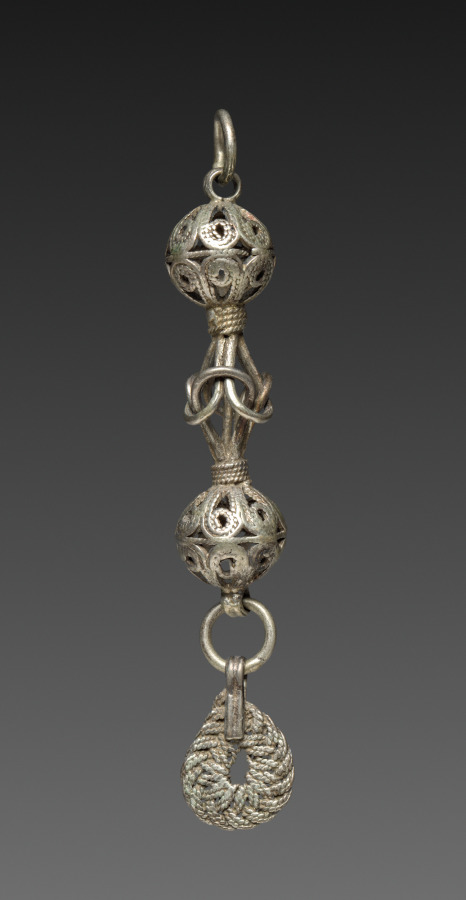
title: Button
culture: Balkans(?), 19th century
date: 1800s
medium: silver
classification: Jewelry